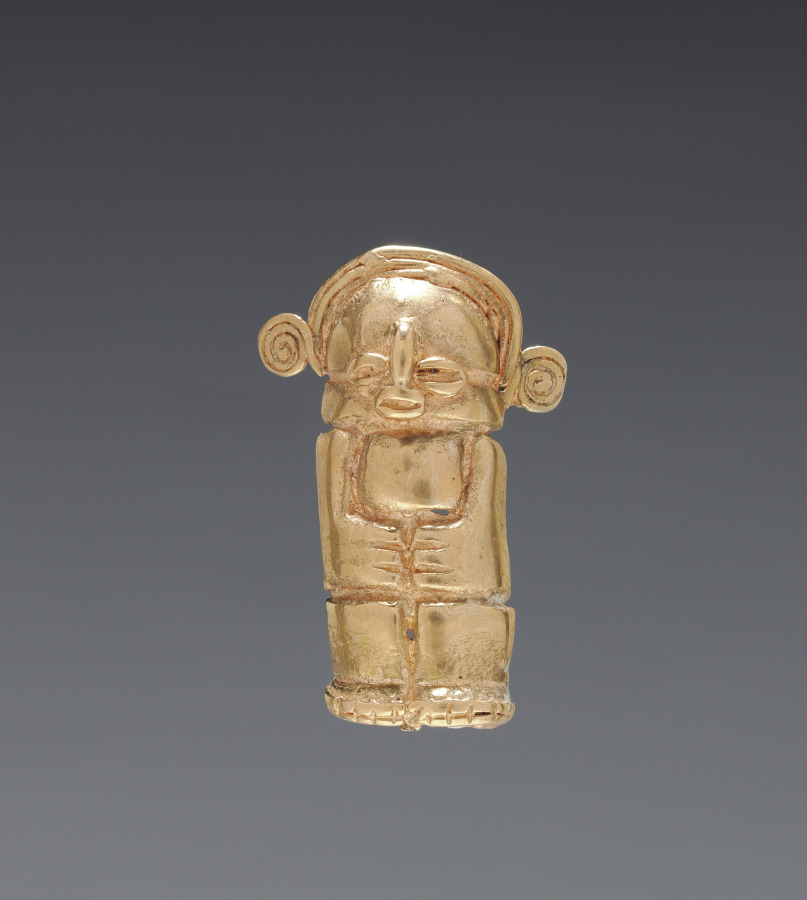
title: Necklace Figurine Bead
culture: Colombia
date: 1–700 CE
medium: cast gold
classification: Jewelry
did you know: Working with gold dates back to at least 500 BC in Ecuador and Colombia.